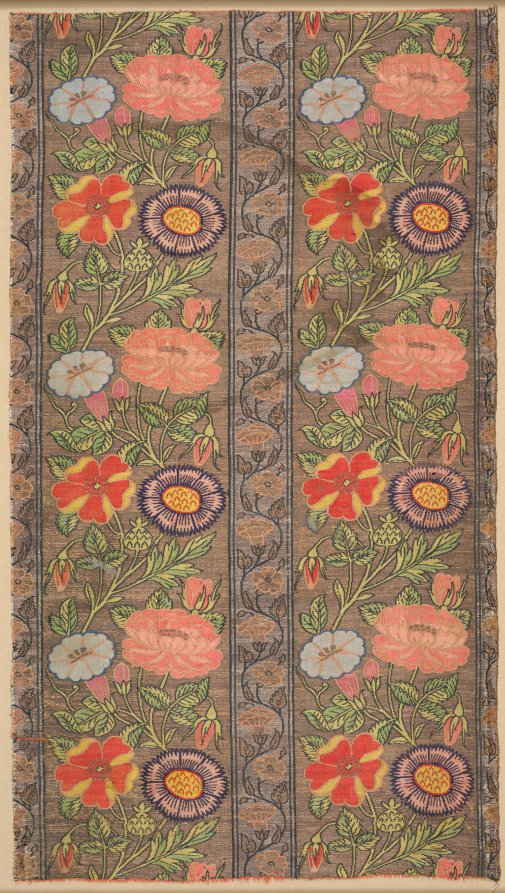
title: Floral striped silk on a golden ground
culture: Iran, Safavid period (1501–1722)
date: 1600–1650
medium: silk, gilt- and silver-metal thread: samite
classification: Textile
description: Twelve jewel-like colors of silk thread illustrate the vivacity of colors extolled in Iranian flowers on gilt- and silver-metal thread grounds. In a simplified seminaturalistic style, swaying branches support an exuberant array of blossoms in the Safavid tradition while the botanical accuracy of European prints inspired flora in varied angles and stages of maturity. Although celebrated in Iranian poetry for centuries, flowers were not featured in paintings and textiles until the 1640s, inspired by European herbals. This sturdy silk retains its radiant colors in contrast with many silks that have faded from excessive light exposure, especially the reds and pinks that were dyed with light-sensitive safflower dyestuff.